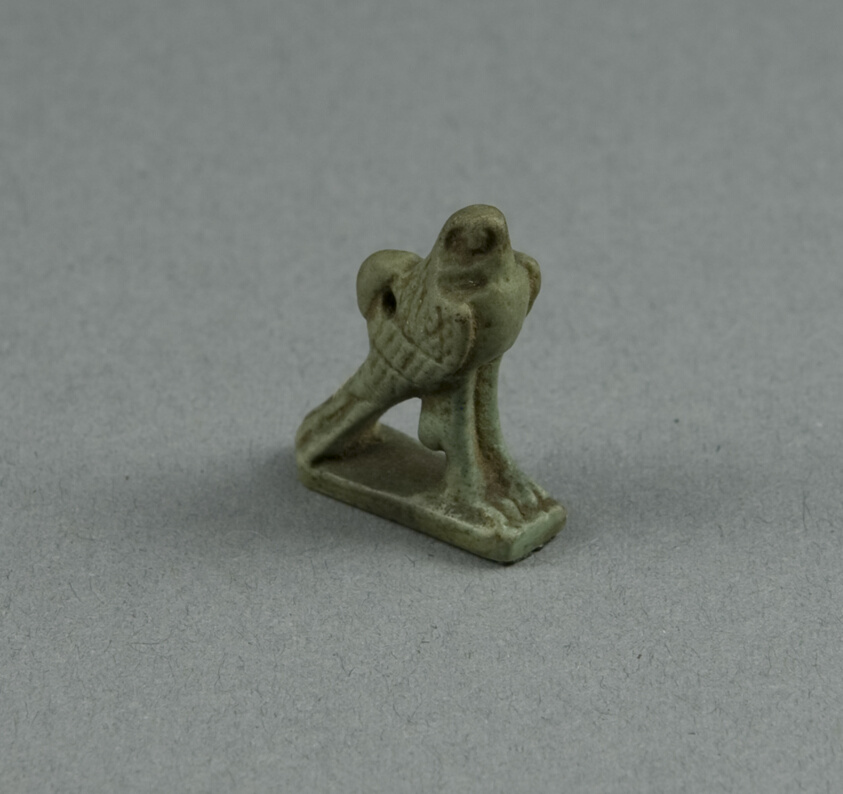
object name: Costume and Accessories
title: Amulet of a Hawk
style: third intermediate period, egyptian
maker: Egyptian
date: Third Intermediate Period, Dynasty 21–25 (1070–656 BCE)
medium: Faience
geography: Egypt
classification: amulet; jewelry; ceramics; ancient art; costume; faïence (composite material)